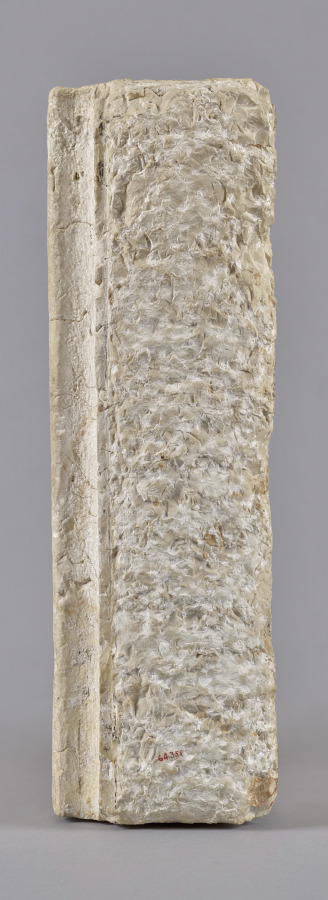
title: Tomb Relief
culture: Syria, Palmyra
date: 230 CE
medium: limestone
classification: Sculpture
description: Although its findspot is unknown, this high relief almost certainly once sealed a burial niche of a mausoleum at Palmyra. It illustrates a blending of Roman and Parthian artistic traditions. Set within a sumptuous border of beads and leaves, a wealthy man awakens on a luxuriously cushioned bed as his attendant offers him a wine bowl decorated with crosshatchings. Both are dressed according to Parthian custom, wearing pants and pleated tunics, but the man’s languid pose is taken from classical prototypes. The subject is a variant of a formulaic funerary banquet scene in which proffered wine welcomes the deceased into a well-appointed afterlife.